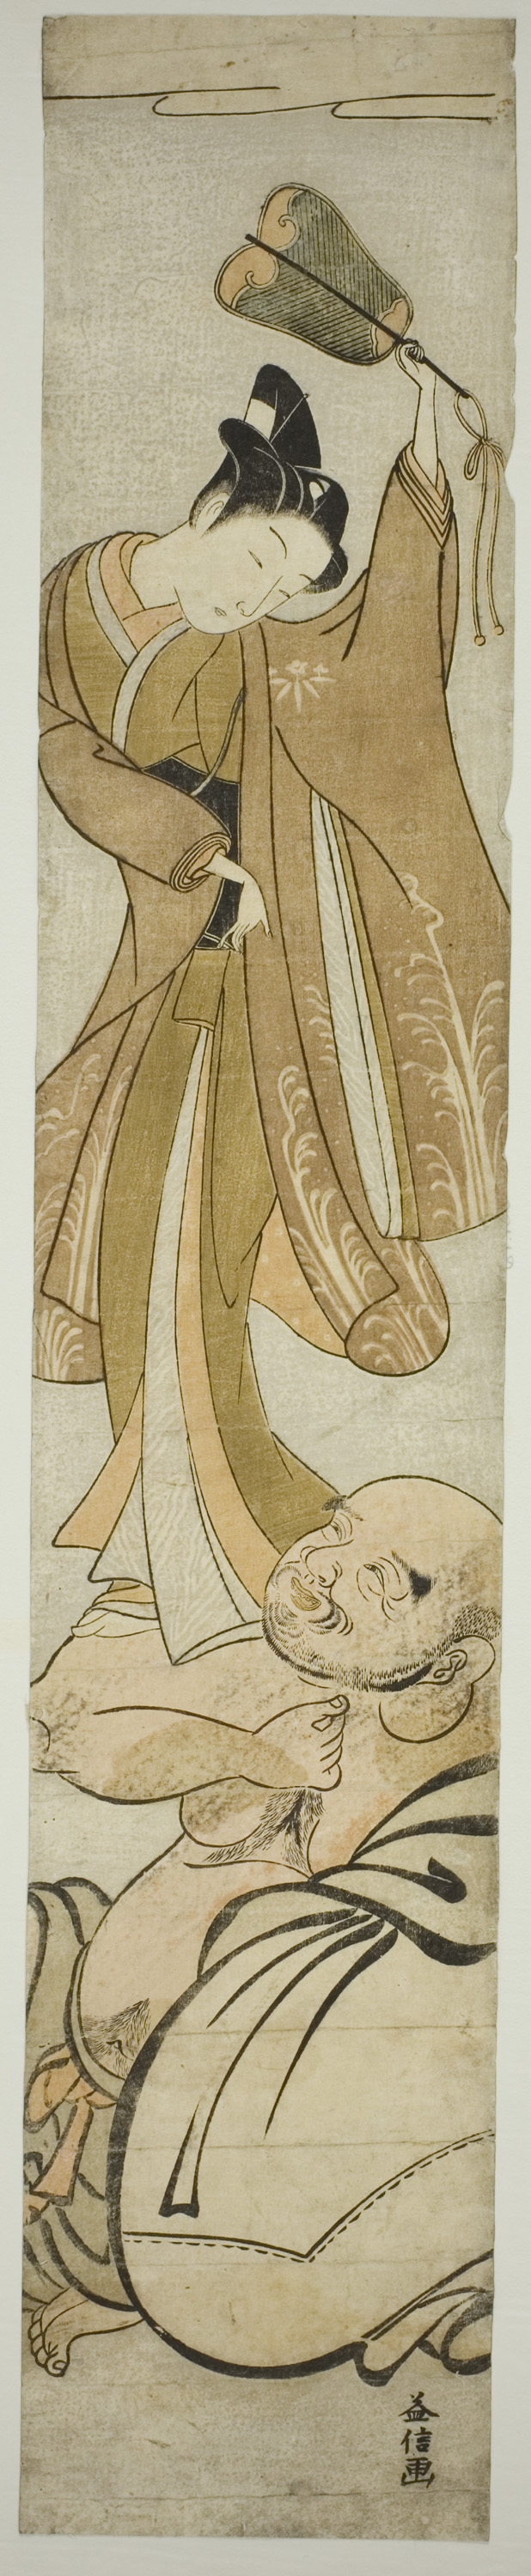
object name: Print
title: Hotei Balances a Young Man on His Arm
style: Japanese (culture or style)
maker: Masunobu (Japanese, active c. 1764-72)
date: c. early 1770s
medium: Color woodblock print; hashira-e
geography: Japan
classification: woodblock print; print; asian art